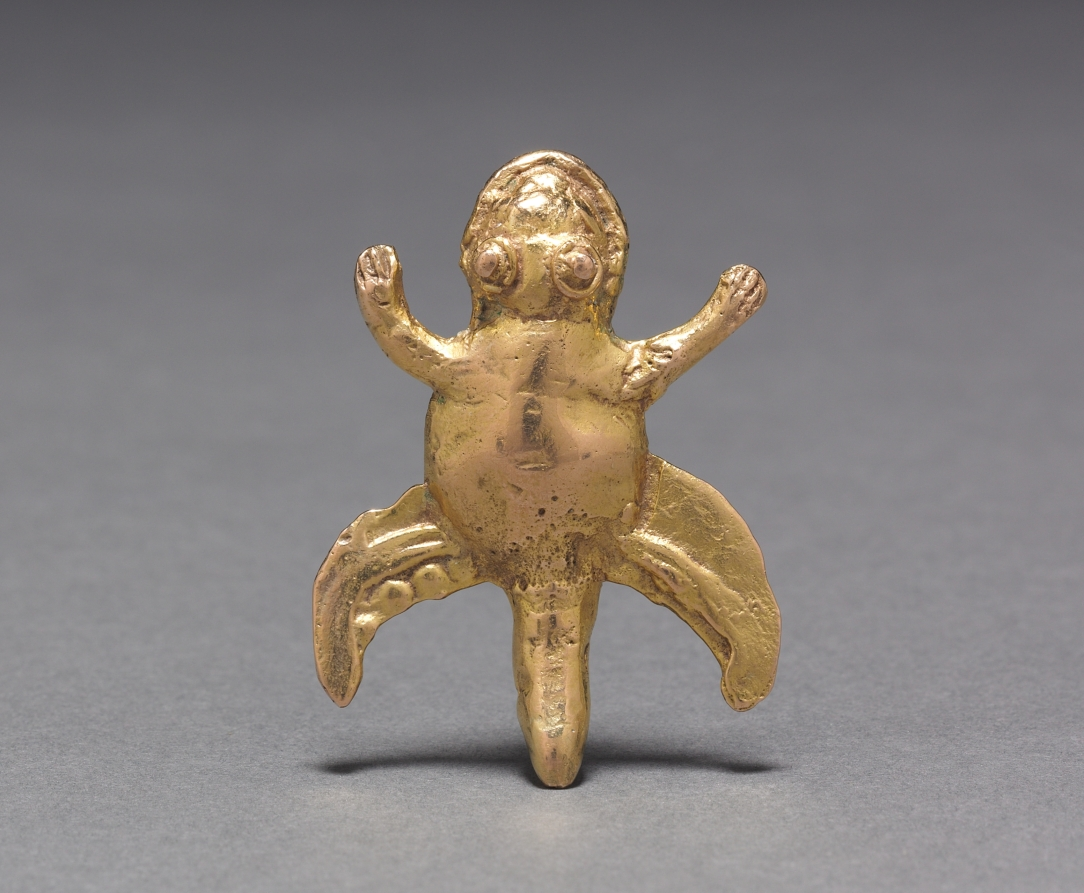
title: Tadpole Pendant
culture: Panama, Veraguas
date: 800–1500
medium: cast gold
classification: Metalwork